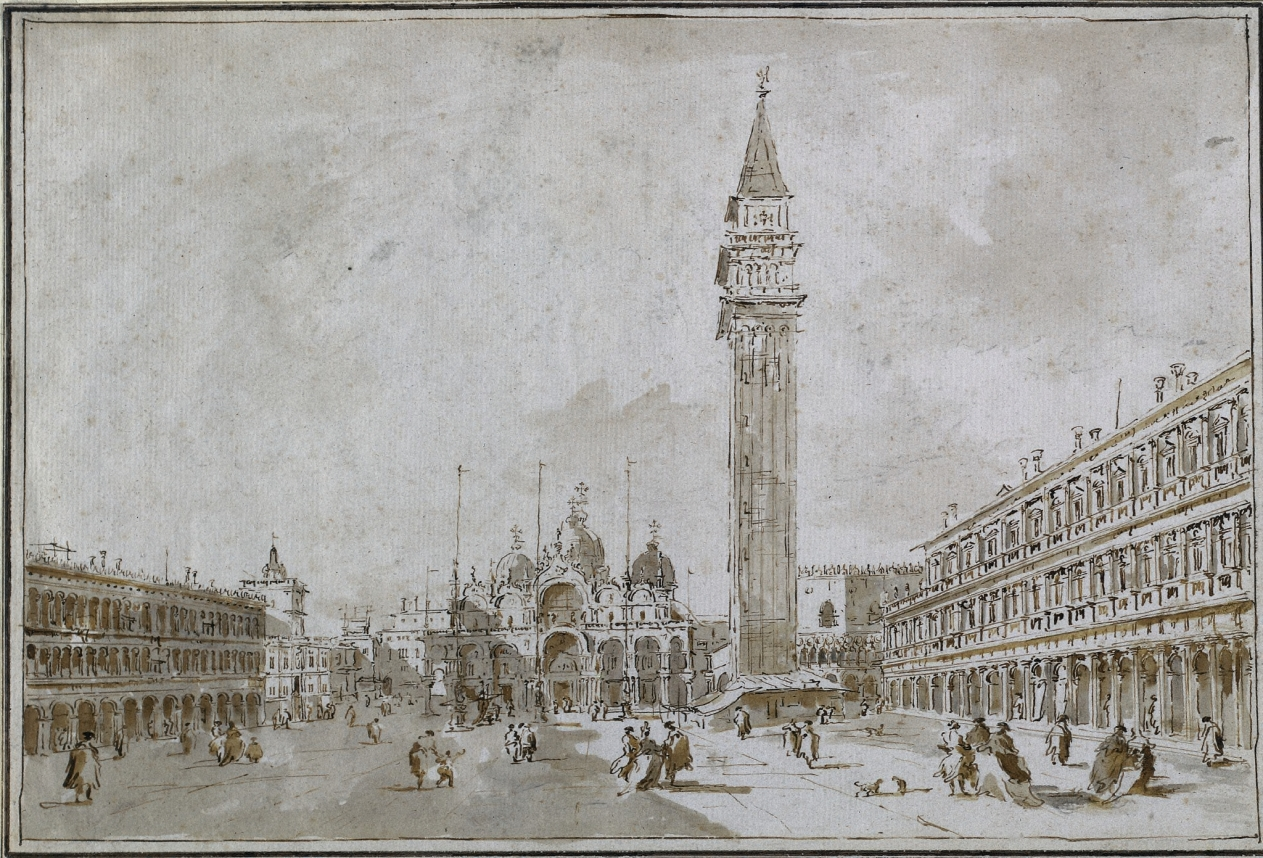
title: Piazza San Marco, Venice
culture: Italy, Venice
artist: Francesco Guardi (Italian, 1712–1793)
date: 1780s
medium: pen and brown ink, brush and brown wash, with brush and gray wash (possibly chalk) and traces of black chalk, framing lines in brown and black ink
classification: Drawing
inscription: VERSO, center, in graphite: 588 2 [underlined, upside down] ; lower left, in red chalk: [5 ?]7 [sideways]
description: The plaza known as the Piazza San Marco in Venice was as popular among tourists in the 1700s as it is today, and the painter Francesco Guardi provided the wealthiest of these visitors with both painted and drawn images of it. The Cleveland drawing is one of a number by Guardi that depict the same view, showing the facade of the Basilica of San Marco at the far end, the campanile (bell tower), and the Procuratie Nuove, the building seen in perspective at the right. This drawing was likely executed in Guardi’s studio, perhaps from a model made on-site using a camera obscura to capture the wide-angle viewpoint of the square. Traces of black chalk indicate where Guardi carefully worked out the arrangement and perspective of the buildings before delineating them with staccato strokes of his pen, imparting freshness and a sketchlike immediacy to his composition. His painterly handling of brown wash bathes the square in dramatic shadow. The square is populated by stock figures who take leisurely strolls under the late afternoon sun; yet the protagonist of the painting could be said to be Venice itself—the city known as La Serenissima (the Most Serene).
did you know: Francesco Guardi painted the Piazza San Marco at least twenty times during his life, in addition to a number of drawings.